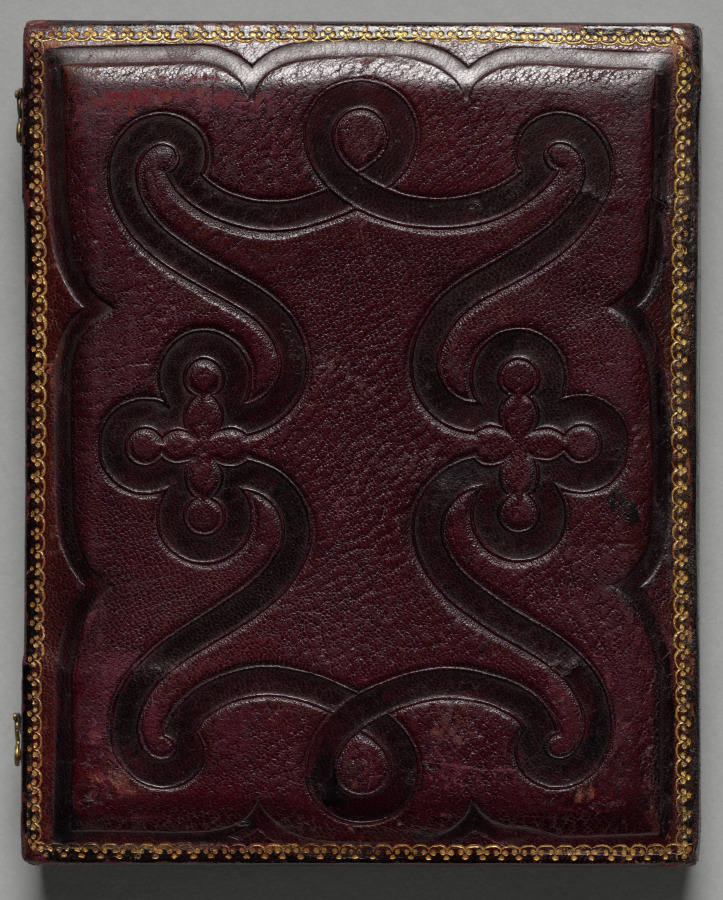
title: Secretary for a Lodge of a Temperance Organization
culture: America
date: c. 1854–55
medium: daguerreotype, half-plate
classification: Photograph